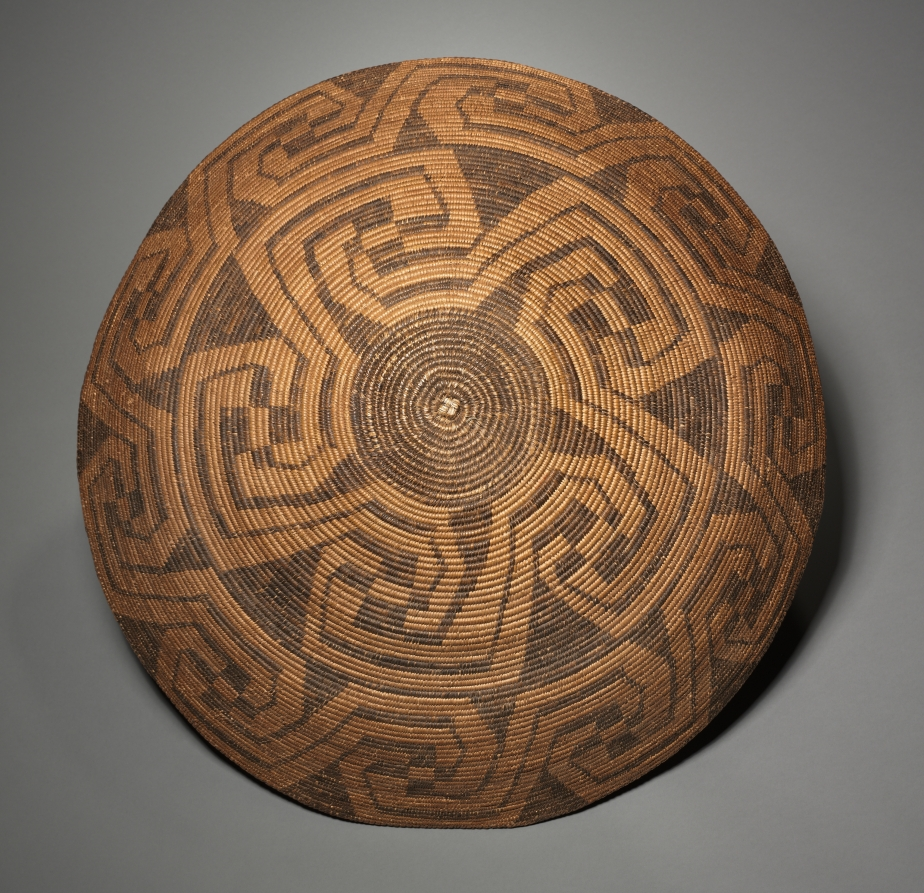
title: Tray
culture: Akimel O'odham (Pima), 20th century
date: before 1929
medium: coiled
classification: Basketry